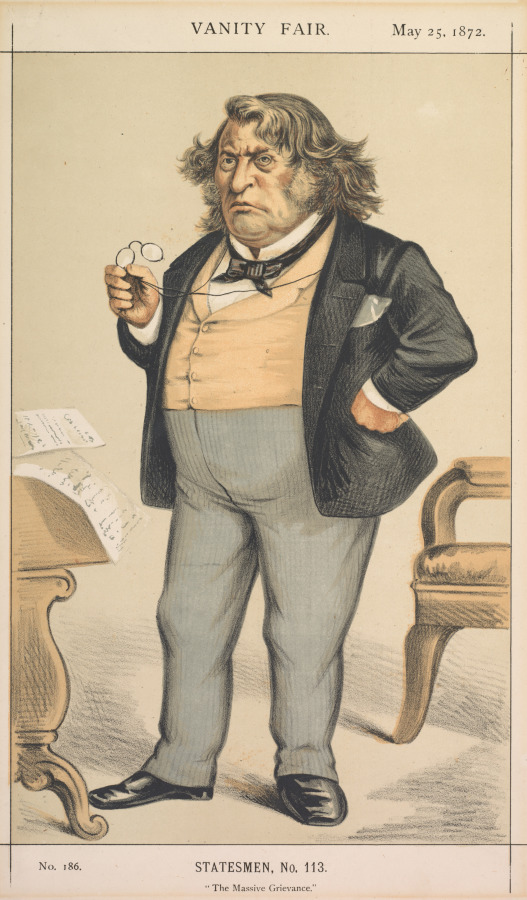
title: Vanity Fair: Statesman, No. 113 "The Massive Grievance"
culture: America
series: published in Vanity Fair, May 25th 1872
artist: Thomas Nast (American, 1840–1902)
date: 1872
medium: color lithograph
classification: Print